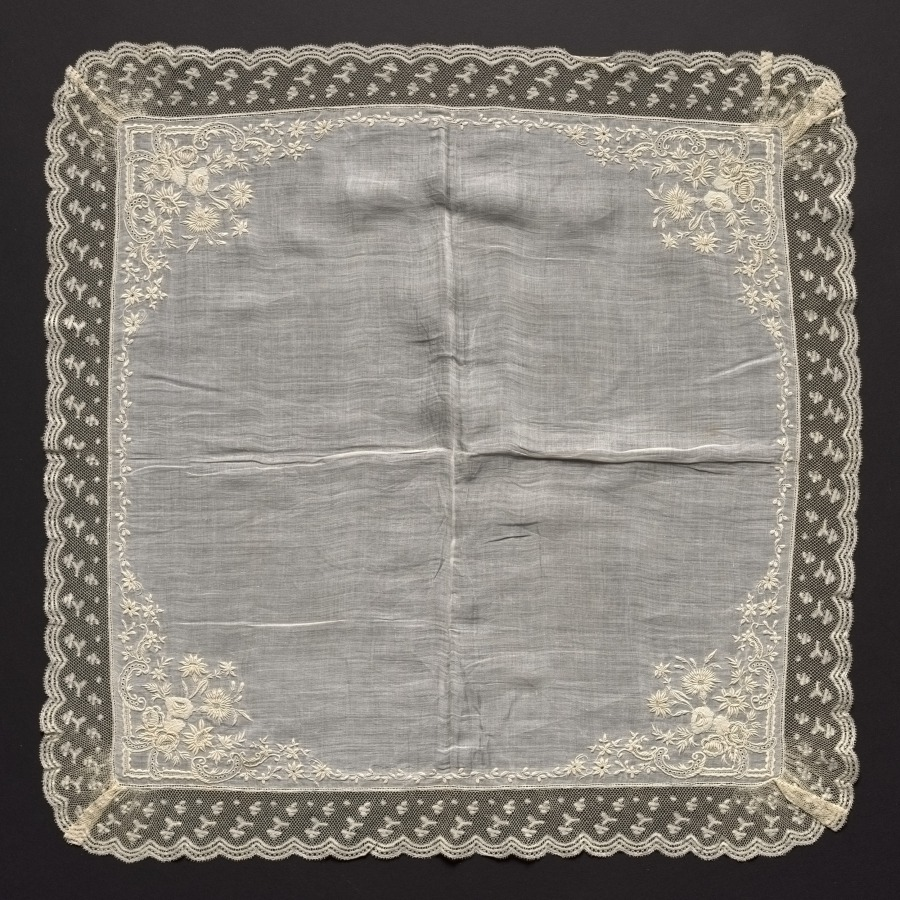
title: Lace Handkerchief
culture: Flanders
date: 1700s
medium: plain weave linen center with bobbin lace (Valenciennes lace) edging and embroidery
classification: Embroidery